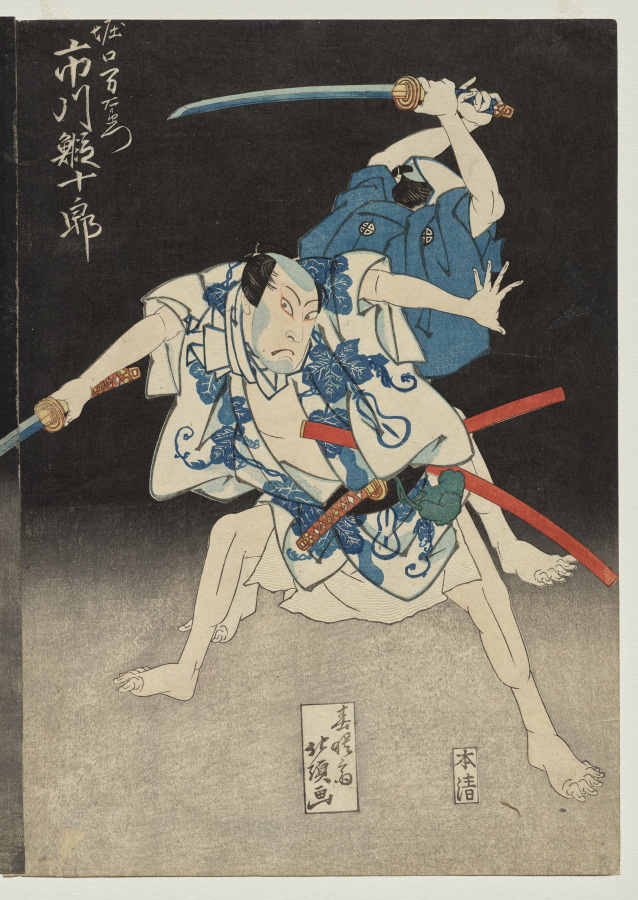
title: Ichikawa Ebijūrō II as Horiguchi Manzaemon from the Kabuki Play "Eight Views of the Kizu River by Boating Song"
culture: Japan, Edo period (1615–1868)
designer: Shunshosai Hokuchō (Japanese, active 1822–1830)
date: 1829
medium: Right print from a triptych of color woodblock prints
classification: Print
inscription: Signature: Shunshosai Hokucho ga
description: Three prints form a continuous scene from a Kabuki play written in 1778 by Namiki Gohei I (1747–1808) and produced at the Kado Theater in Osaka in the summer of 1829. It was the final performance for actor Ichikawa Ebijūrō II (1806–1829; right)—highly regarded for portraying villains—because he got sick and died several months later. This design belongs to a category of Japanese prints called “actor images” (yakusha-e or 役者絵). They were collected by fans of popular Kabuki actors. Kabuki is a kind of entertainment that got its start in the early Edo period, evolving from dance performances with simple storylines to long plays with complex plots, elaborate sets, and full musical accompaniments. Performers wear showy costumes and heavy makeup and strike poses called mie at critical moments in the narrative. Dialogue is spoken in a stylized way that resembles singing.